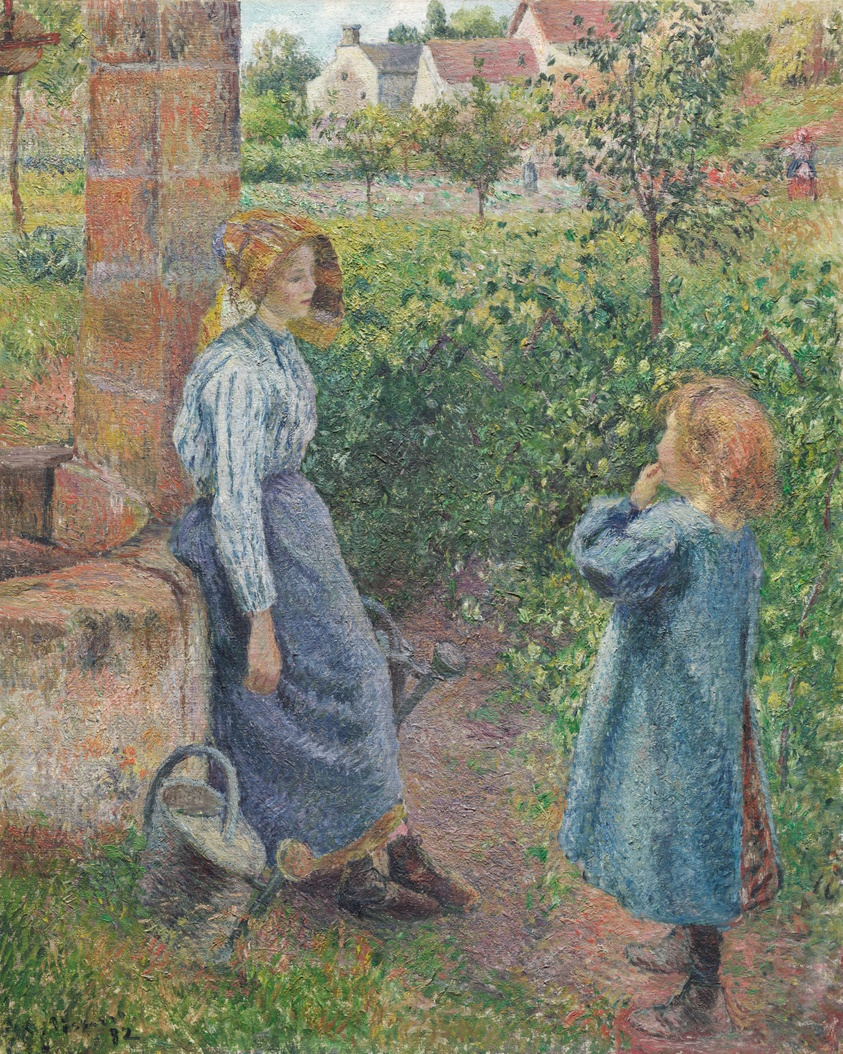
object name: Painting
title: Woman and Child at the Well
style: Post-Impressionism, nineteenth century, 19th century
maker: Camille Pissarro (French, 1830–1903)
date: 1882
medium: Oil on canvas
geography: France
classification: painting; paint; oil paintings (visual works); oil on canvas; french; european painting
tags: woman with children, woman, woman, house, figures, buildings, nature, foliage, bushes, trees, everyday life (genre), weather/seasons, women, children, Century of Progress, world's fairs, Chicago World's Fairs